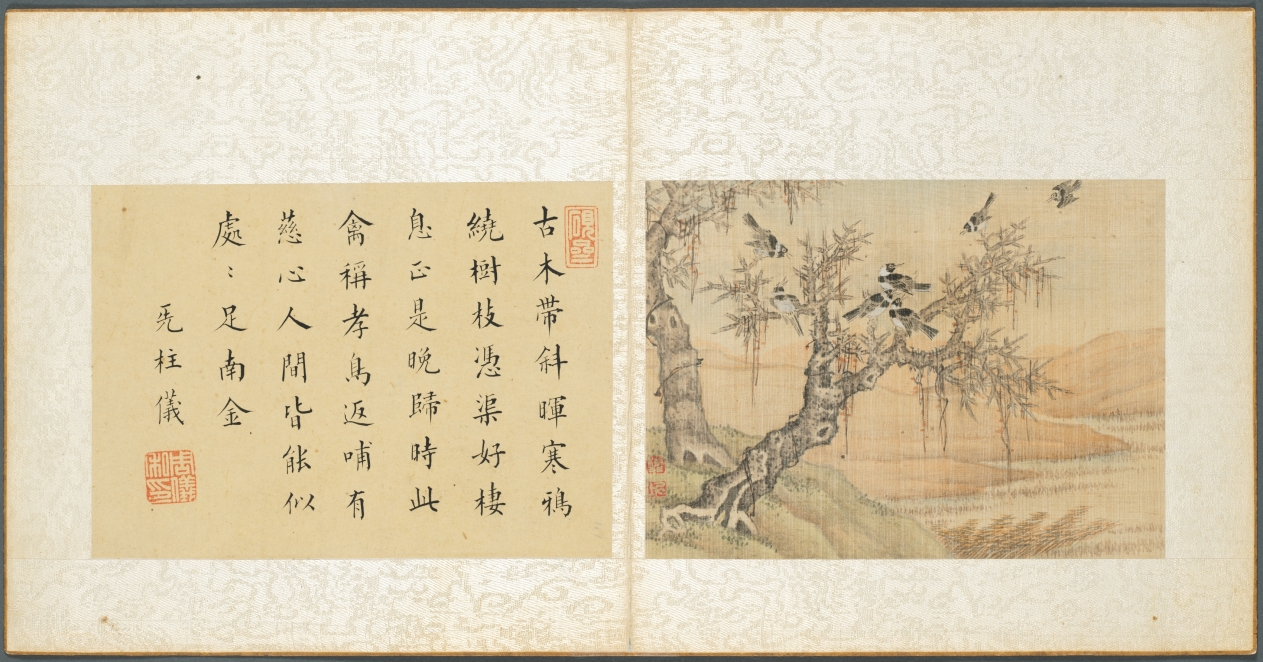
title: Album of Miscellaneous Subjects, Leaf 9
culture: China, Qing dynasty (1644-1911)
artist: Fan Qi (Chinese, 1616–after 1694)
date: early 1650s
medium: album leaf, ink and color on silk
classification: Painting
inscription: Artist seal: Fan Qi 樊圻. Poem by Zhou Yi 周儀 (mid 17th century–about 1705): Ancient trees share the slanting rays of the setting sun/ Chilly ravens hover round their branches/ The leader of the flock thinks this is a good place to rest,/ Evening being the time for returning./ This flock is the so-called a filial crow,/ Who, in disgorging their food [to feed their young], have compassionate hearts,/ Were the people in the world all like this,/ Fine talent would be everywhere.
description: Leaf 9 Zhou Yi's colophon reads: Ancient trees share the slanting rays of the setting sun. Chilly ravens hover round their branches. The leader of the flock thinks this a good place to rest, Evening being the time for returning. This flock is the so-called filial crow, Who, in disgorging their own food [to feed the young], have compassionate hearts. Were the people in the world all like this, Fine talent would be everywhere.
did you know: The winter landscape turns ocher at dusk, and the birds roost for the night.